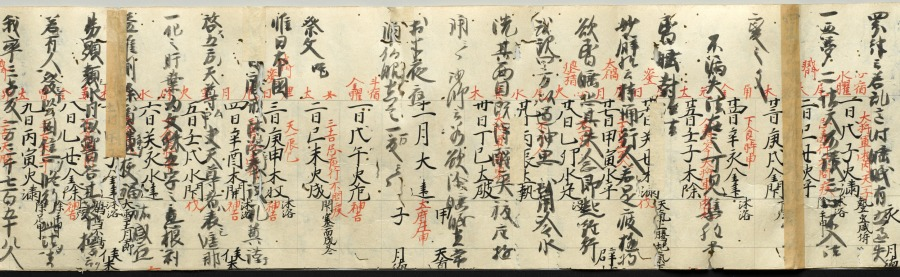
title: Scroll of Miscellaneous Notes written on a Calendar by Priest Seigen (verso)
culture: Japan, Kamakura period (1185–1333)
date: c. 1200–1231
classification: Manuscript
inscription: bears miscellaneous notes written by Priest Seigen.